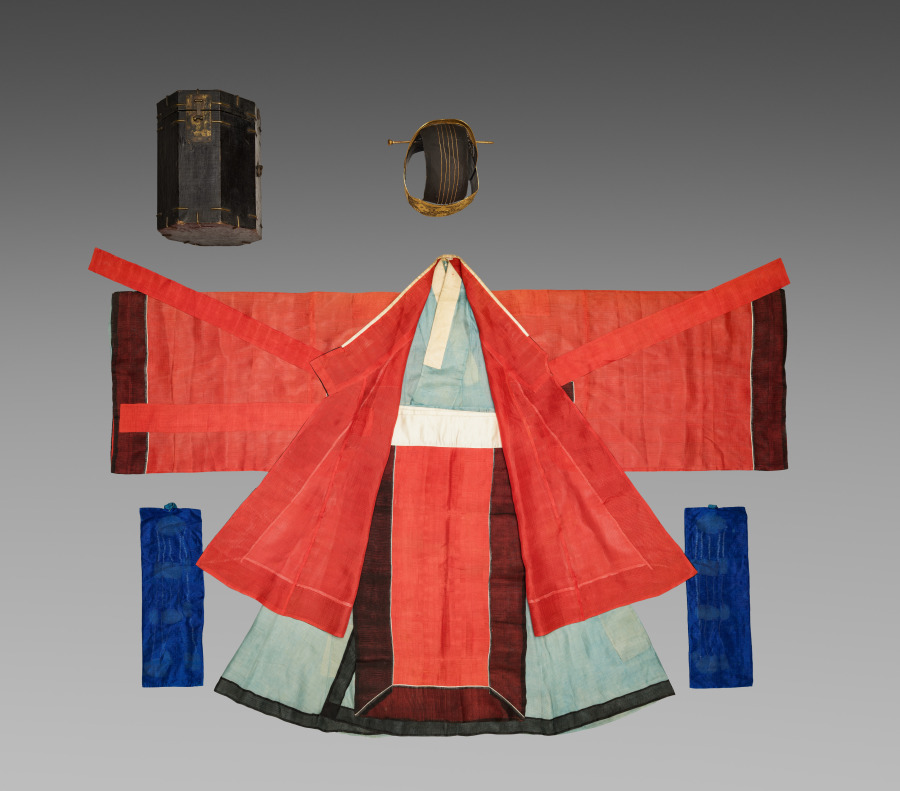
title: Royal Ceremonial Costume and Accessories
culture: Korea, Joseon dynasty (1392–1910)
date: late 1800s-early 1900s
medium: gilded paper, wire, black silk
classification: Garment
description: This is a set of royal ceremonial robe and accessories worn by a high-ranking court official for attending special state ceremonies. The set consists of an inner coat, an outer coat, a skirt, a back apron, a crown, a pair of jade tassels, a tablet, and a belt.